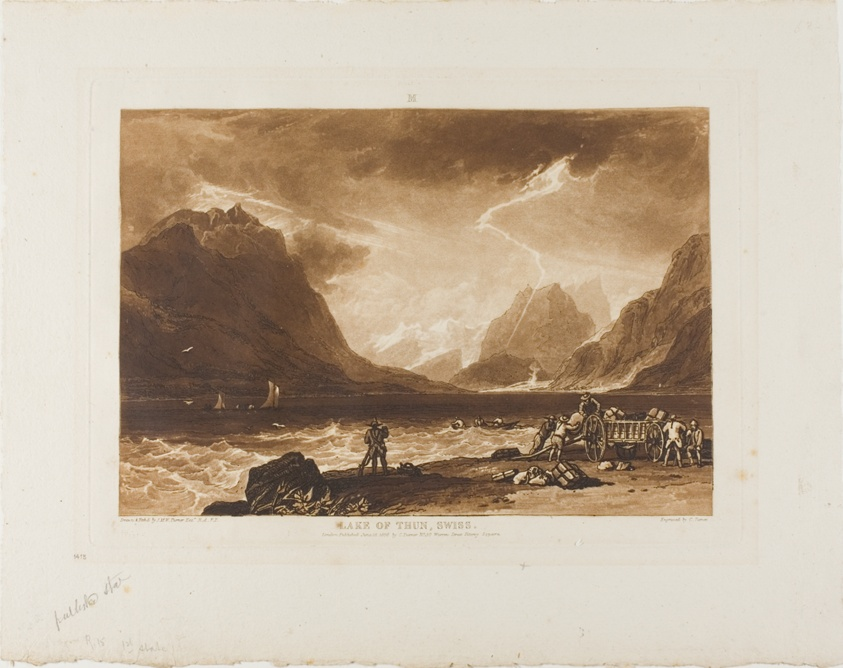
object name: Print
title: Lake of Thun, plate 15 from Liber Studiorum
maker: Joseph Mallord William Turner (English, 1775-1851); Engraved by Charles Turner (English, 1773-1857)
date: Published June 10, 1808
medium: Etching and aquatint in brown on ivory paper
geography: England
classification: etching; print; prints and drawing